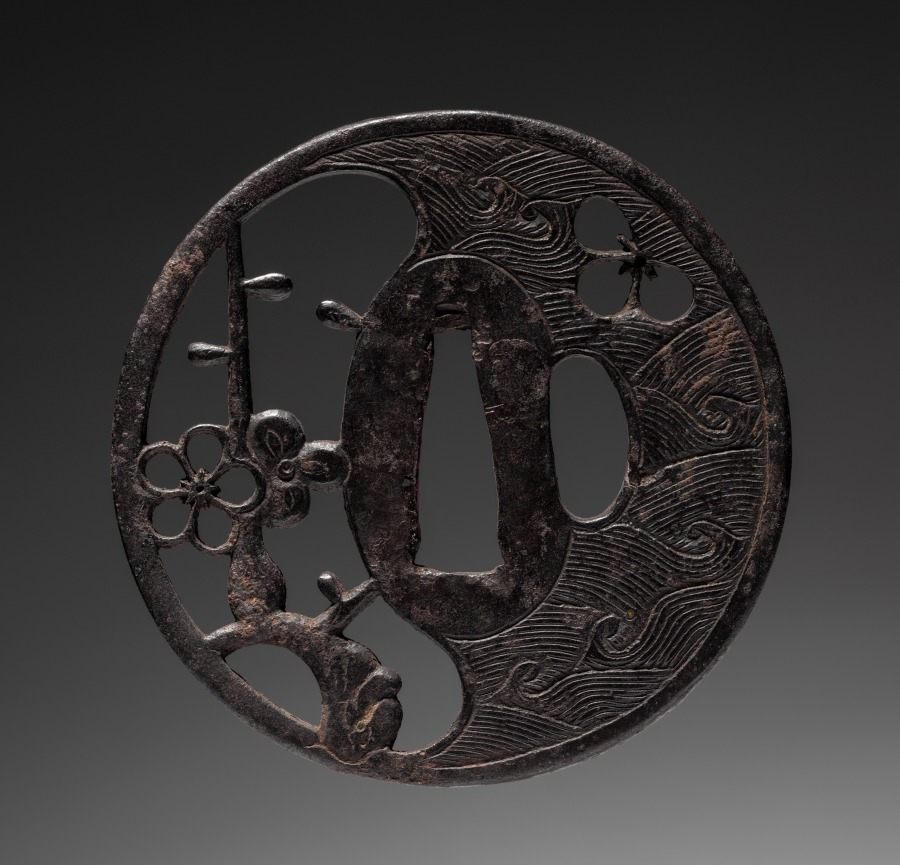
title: Sword Guard (Tsuba) with Plum and Waves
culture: Japan, possibly Edo period (1615-1868)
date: c. 1615–1868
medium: iron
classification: Arms and Armor